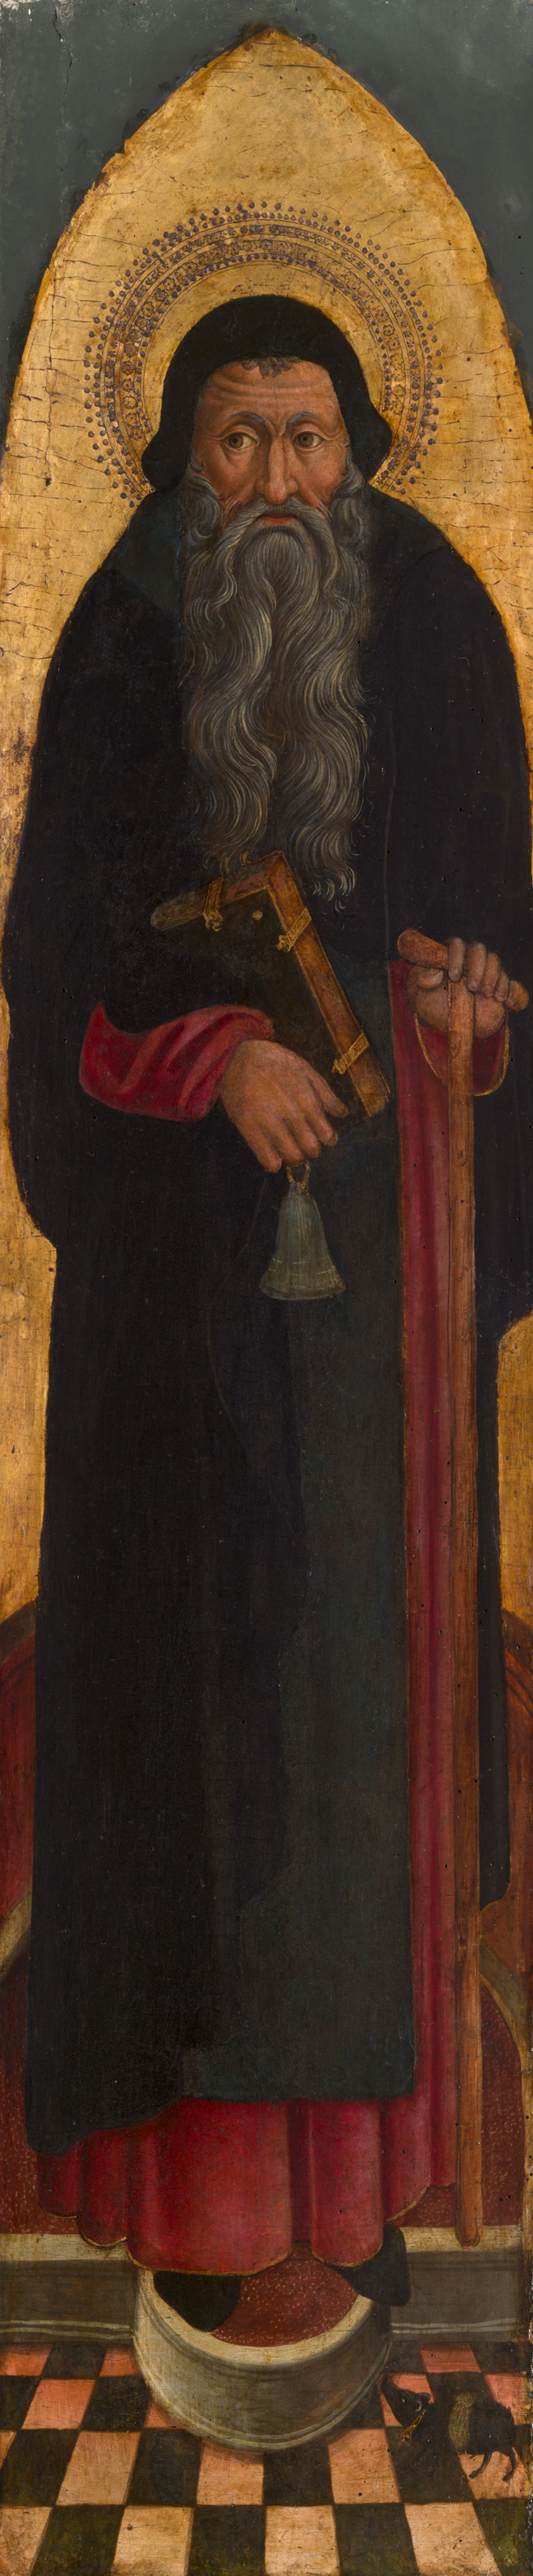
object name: Painting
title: Saint Anthony Abbot from an Augustinian altarpiece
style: 15th century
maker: Italian; Venice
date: 1450/75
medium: Tempera and oil on panel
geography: Venice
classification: altarpiece; tempera; altar; Italian; oil on panel; oil paintings (visual works); painting; european painting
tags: saints, altar, Christian subjects, Christianity, religion, religious, religious attire, religious figures, religious scenes, bearded man, book, bibles, man